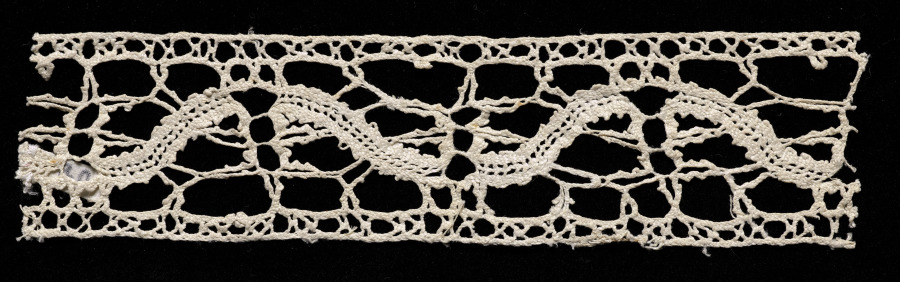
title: Lace Insertion (no selvage)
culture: Italy, Venice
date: 1580–99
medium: Bobbin lace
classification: Lace